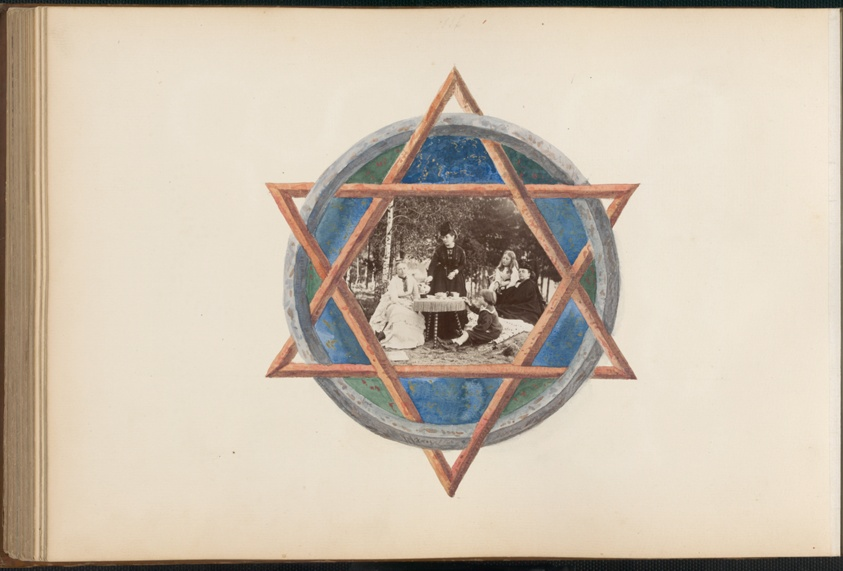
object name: Photograph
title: The Madame B Album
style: 19th century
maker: Marie-Blanche Hennelle Fournier (French, 1831–1906)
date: 1870s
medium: Albumen print with watercolor (in book)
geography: France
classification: photograph; albumen silver print; photography